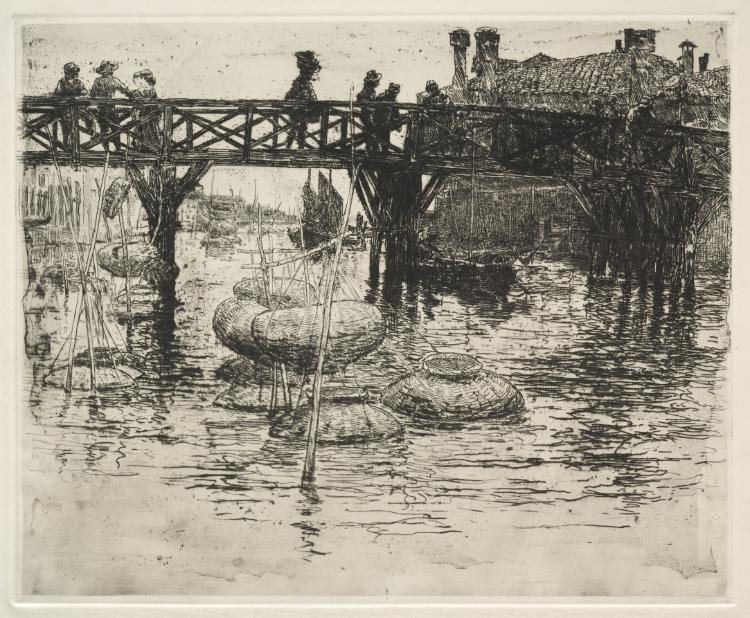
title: San Pietro in Castello, Venice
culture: America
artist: Frank Duveneck (American, 1848–1919)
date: 1883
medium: etching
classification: Print